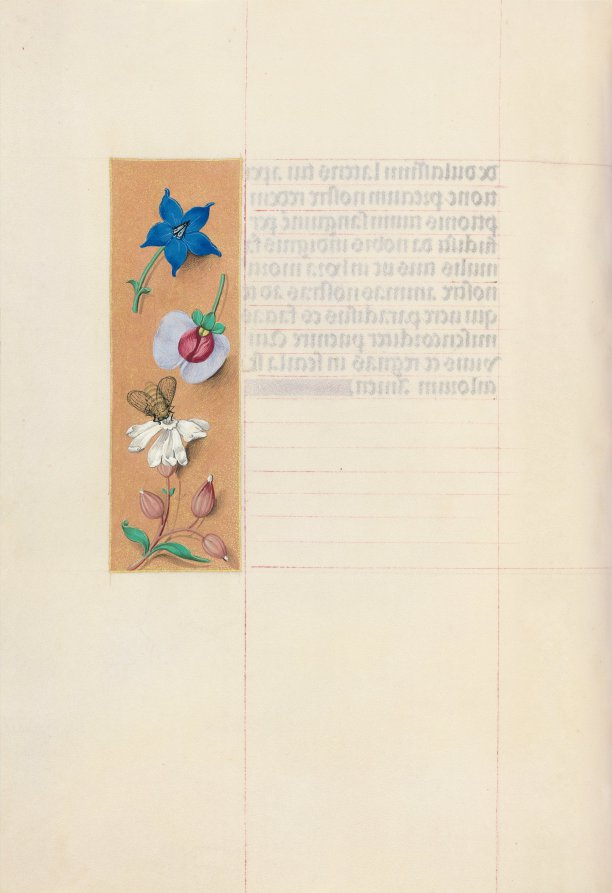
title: Hours of Queen Isabella the Catholic, Queen of Spain: Fol. 71v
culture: Flanders, Ghent and Bruges, late 15th century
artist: Master of the First Prayerbook of Maximillian (Flemish, c. 1444–1519)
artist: and Associates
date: c. 1500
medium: ink, tempera, and gold on vellum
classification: Bound Volume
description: This manuscript was illuminated by a circle of at least five highly organized manuscript painters active in the Flemish cities of Ghent and Bruges. The principal illuminator was Alexander Bening, who painted the majority of the book's miniatures. Manuscripts produced by this circle of artists are renowned for the decoration of their borders, which typically feature a rich variety of realistically-painted flowers, birds, and butterflies. This prayer book, called a book of hours, was intended not for a cleric, but for the private devotions of a lay person-in this case, Isabella the Catholic, Queen of Spain (1451-1504). Isabella's coat of arms embellishes the book's frontispiece. It is unlikely that the book was commissioned by the Queen herself; rather, she probably received it as a diplomatic gift from someone courting her patronage, perhaps Cardinal Francisco Jimenez de Cisneros. A Franciscan friar, Jimenez was dependent upon Isabella for his advancement, first to the post of Queen's confessor in 1492, and then to Archbishop of Toledo in 1495.